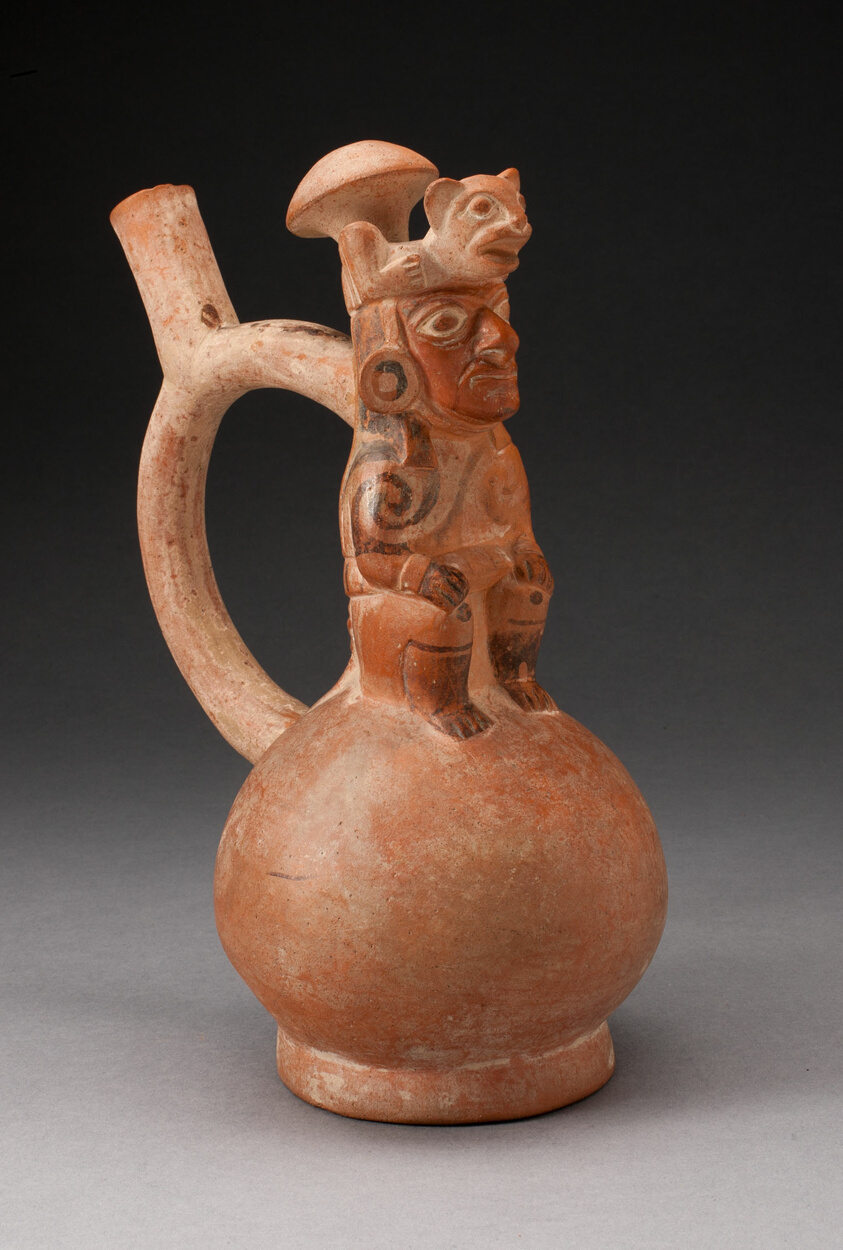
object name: Vessel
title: Handle Spout Vessel in the Form of a Seated Royal Figure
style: moche, south american, andes, Arts of the Americas, andean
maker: Moche (North coast, Peru)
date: 100 BCE–500 CE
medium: Ceramic and pigment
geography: Peruvian North Coast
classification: earthenware; ceramics; vessel; art of the americas